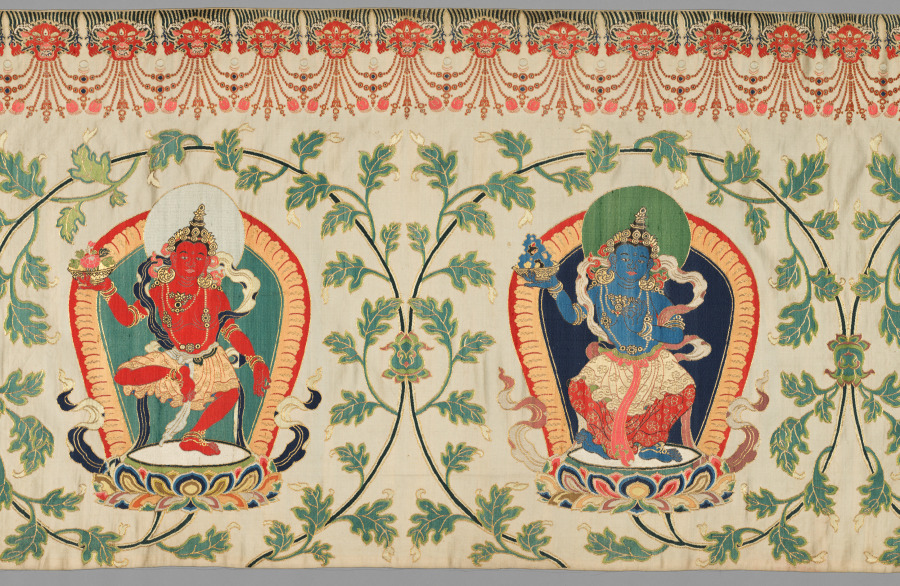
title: Brocaded Strip, known as "Imperial Tribute Brocade"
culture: China, Qing dynasty (1644-1911)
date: c. 1770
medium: brocaded satin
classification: Textile